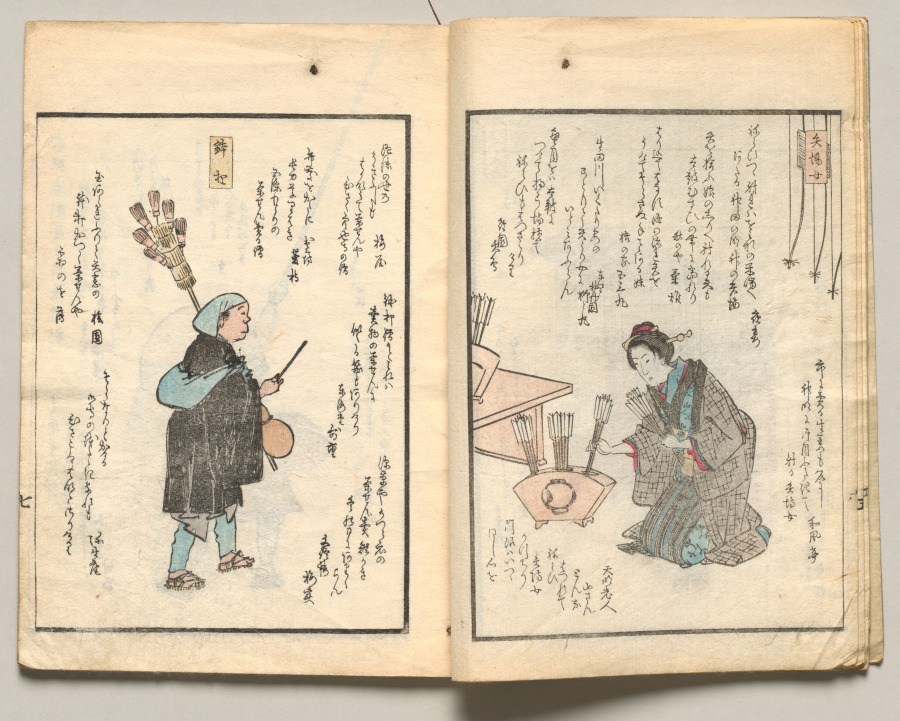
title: Spread Seven from Volume Four of People of Japan in Light Verse (Kyōka)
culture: Japan, Edo period (1615–1868)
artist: Utagawa Hiroshige (Japanese, 1797–1858)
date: 1857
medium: Woodblock-printed book; ink and color on paper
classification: Bound Volume